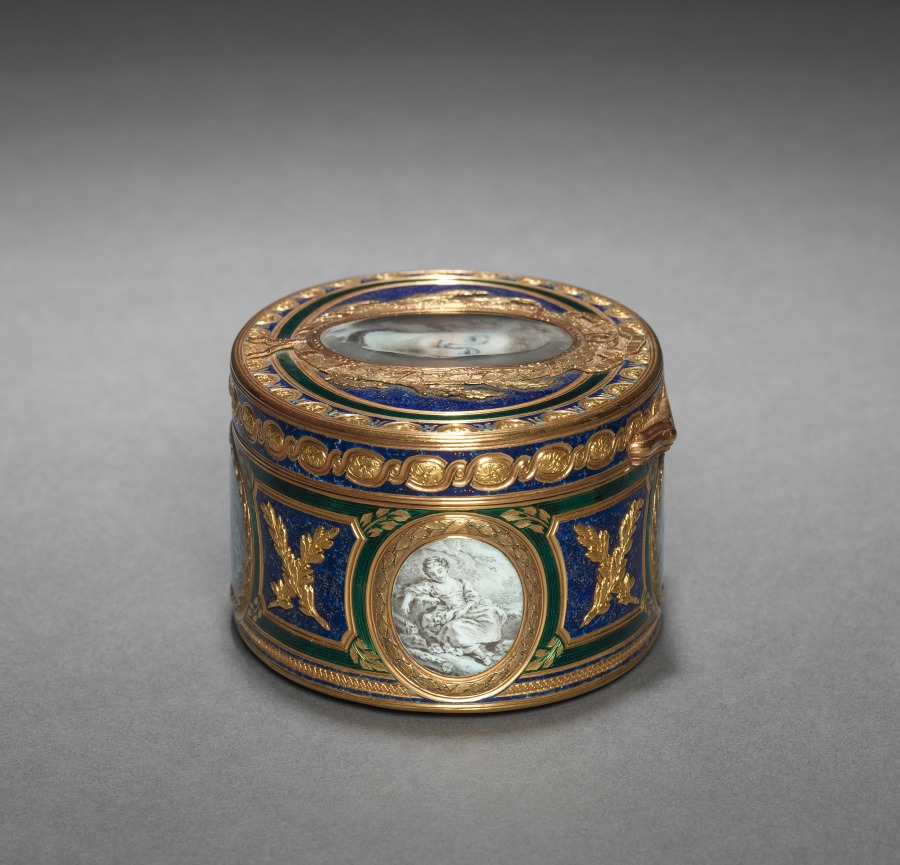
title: Snuff Box (Tabatière) with Portrait of Marie Antoinette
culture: France, 18th century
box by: Pierre-François-Mathis de Beaulieu (French)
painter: François Dumont (French, 1751–1831)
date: 1768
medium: watercolor on ivory in a gold and enamel box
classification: Enamel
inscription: [Maker's mark of Pierre-François-Mathis de Beaulieu, master goldsmith in 1768, inside cover]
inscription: [Charge mark of Jean-Jacques Prévot, 1762-1768, inside cover]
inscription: [Warden's mark of Paris, 1768-1769, inside cover]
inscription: [Discharge mark of Julien Alaterre, Paris, 1768-1774, on neck at right]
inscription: [Inside box, the letter]: "F"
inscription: [On bezel at left, engraved number]: "627"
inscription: [On front of bezel, engraved signature]: "Ve Georges Beaulieu à Paris"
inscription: [On right of miniature portrait, the letter]: "D"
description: This box was created through the collaboration of two skilled and well-known artisans of the period, master goldsmith Pierre-François-Mathis de Beaulieu and celebrated miniature painter François Dumont. The portrait of Marie Antoinette on the box's lid is painted in Dumont’s own style while those on the sides and bottom of the box take inspiration from the work of painter François Boucher, known for his pastoral scenes in the Rococo style.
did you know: Marie Antoinette, queen consort of French King Louis XVI and great patron of the decorative arts, was executed in 1793 at the end of the French Revolution.